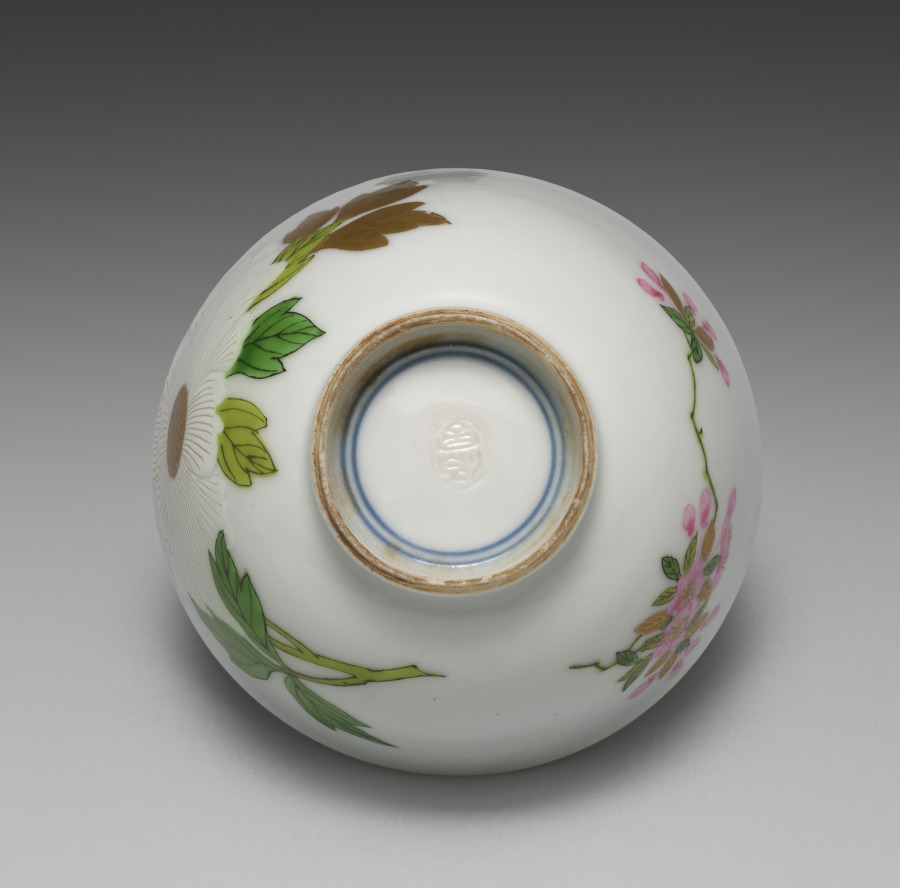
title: Teabowl from Teabowls with Peony and Crabapple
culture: Japan, Meiji period (1868–1912)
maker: Seifū Yohei III (Japanese, 1851–1914)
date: 1893–1914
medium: One from a set of five teabowls; porcelain with underglaze and overglaze color enamels and gold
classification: Ceramic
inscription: 清風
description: Overglaze color enamels are generally called iro-e (literally “color picture”) in the terminology customarily used for porcelain decoration of the Edo period. This set of teabowls is a fine example of Yohei III’s skilled use of the technique, which is identified on this set’s box lid with the alternate phrasing “porcelain with color painting” (jisaiga). Distinct from the way overglaze colors were used in Kakiemon ware from Arita, his designs and applications show a consciousness of porcelain decoration of the Qing dynasty. Here, he combines Chinese models with a sensibility taken from Kyoto ware precedents, including painting with powdered gold (kinrande). The colors used in the bowls are as follows: blue, black, gold, white, light green, green, and pink. The blue appears only inside the footring, as a double band of underglaze color. The black iron, used for stems and leaf veins, is painted over the glaze. The gold, also painted over the glaze, is used for leaves and the centers of flowers, for solid, glossy lines defining detail, or as a semimatte ground. Yohei has incised lines of varying widths into the pigment, carving away to the bowl’s surface, to differentiate individual petals and their rippled shapes. The light and dark greens, as well as the pink, are painted over the glaze. Of note is how Yohei has first used thinly applied lines of light green to draw the plum branch before applying the opaque iron black. For the plum buds and flowers, he has used a diluted pink with an opaque pink for outline, both over the glaze. In his later works, Yohei used pink both over and under the glaze in a manner similar to underglaze blue, and it can be challenging in some cases to discern which technique he has used. A lidded container in a private collection has a similar design but is augmented with the inclusion of white and purple magnolia blossoms. In contemplating the original decorative program of a set, of which these teabowls may have been a part, it is worth considering that perhaps not all objects included the full range of motifs. In such cases, the composition of the individual object may be best understood within the context of the extended ensemble. Here, the delicate pink plum on one side of the bowl seems slightly unbalanced with the bold white peony on the other, but when seen with other objects with the magnolia and its additional colors and shapes, it is possible to imagine a set with a complex, balanced design across multiple pieces.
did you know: The white of the peony flower is built up to a low relief over the glaze.